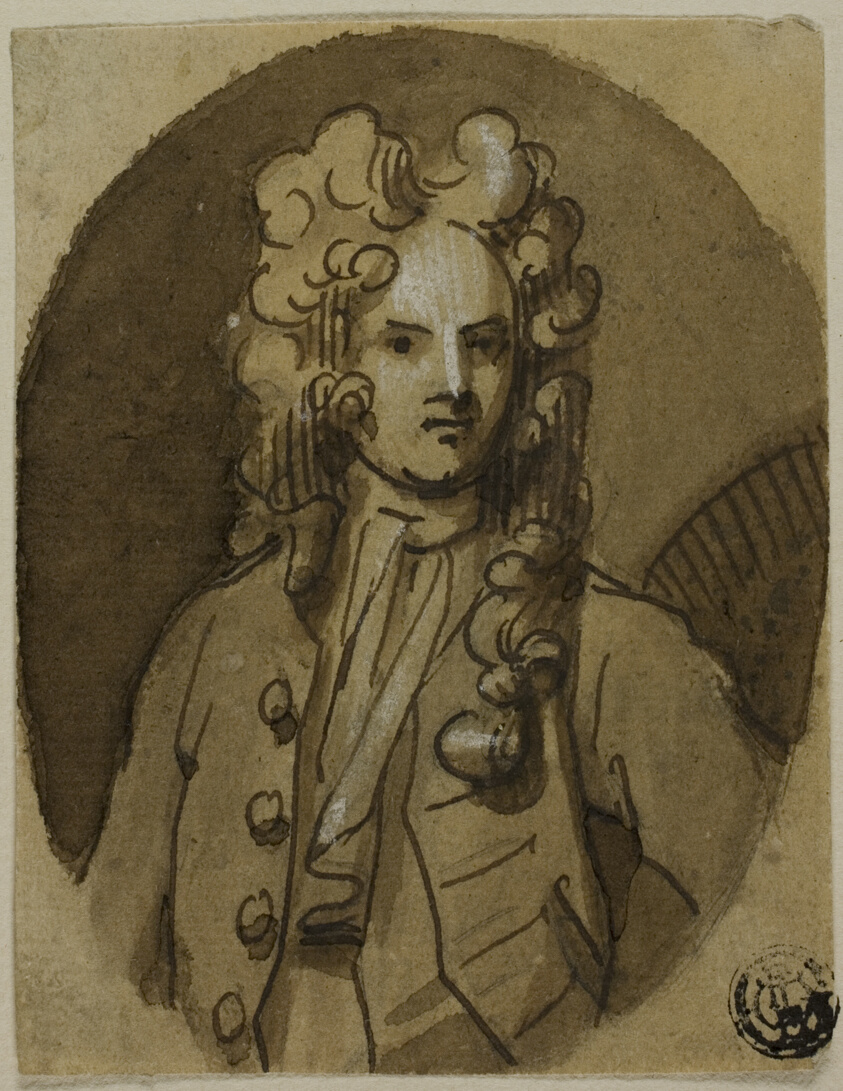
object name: Drawing and Watercolor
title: First Lord Russell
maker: Possibly Sir Peter Lely or after; English, 1618-1680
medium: Pen and brown ink, with brush and brown wash, heightened with touches of white gouache, over graphite, on tan laid paper, tipped on cream laid paper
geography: England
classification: pen and ink drawings; drawings (visual works); prints and drawing